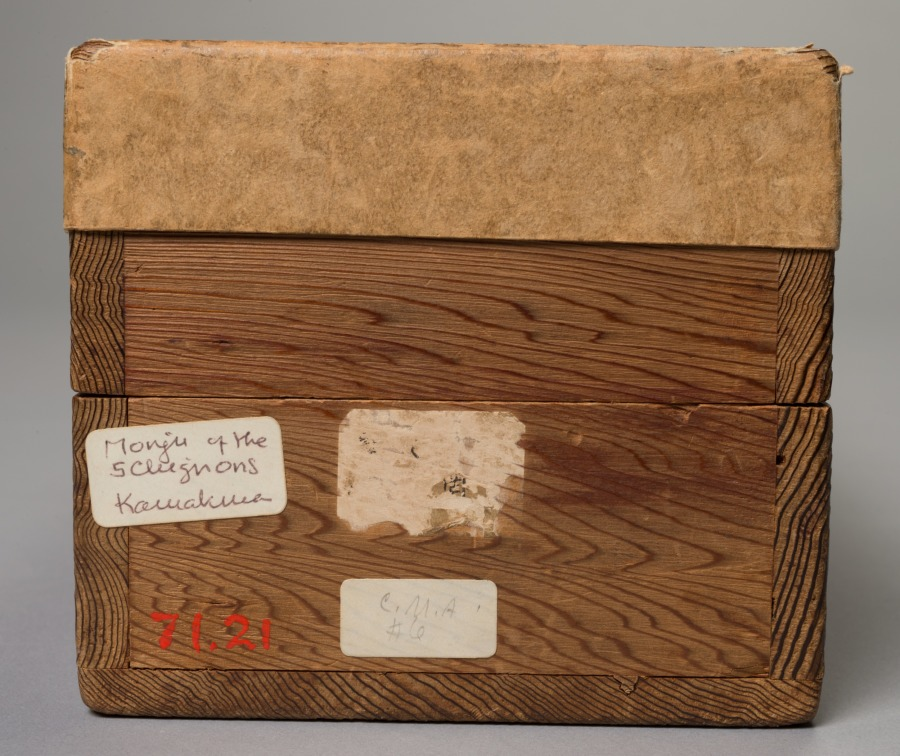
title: Monju with Five Hair Knots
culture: Japan, Kamakura period (1185–1333)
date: late 1200s–early 1300s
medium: Hanging scroll; ink, color, gold, and cut gold on silk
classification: Painting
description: This Buddhist painting shows Monju, Manjushri in Sanskrit, riding a lion. Monju is a bodhisattva, a being who, though enlightened, chooses not to become a Buddha but instead helps others achieve enlightenment. Monju’s youthfulness symbolizes his pure wisdom, unsullied by the world, and his five hair knots represent his vow to keep calamity at bay. The supernatural nature of his lion is emphasized by its hair, every strand painted in gold, as well as by the lotus platforms beneath each of its feet. The boy’s bejeweled body and silk finery is meant to resemble that of an Indian prince.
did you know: This painting is exemplary of the Kamakura period, known for artworks with special attention paid to the realism of images.